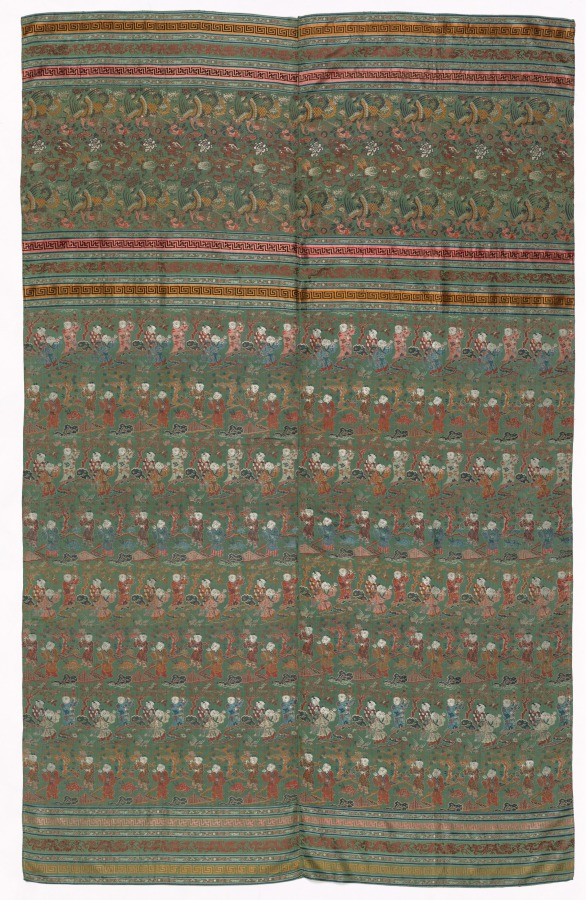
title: Compound Weave Textile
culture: China, Qing dynasty (1644-1911)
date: 1800s ?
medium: compound weave: silk and gold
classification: Textile